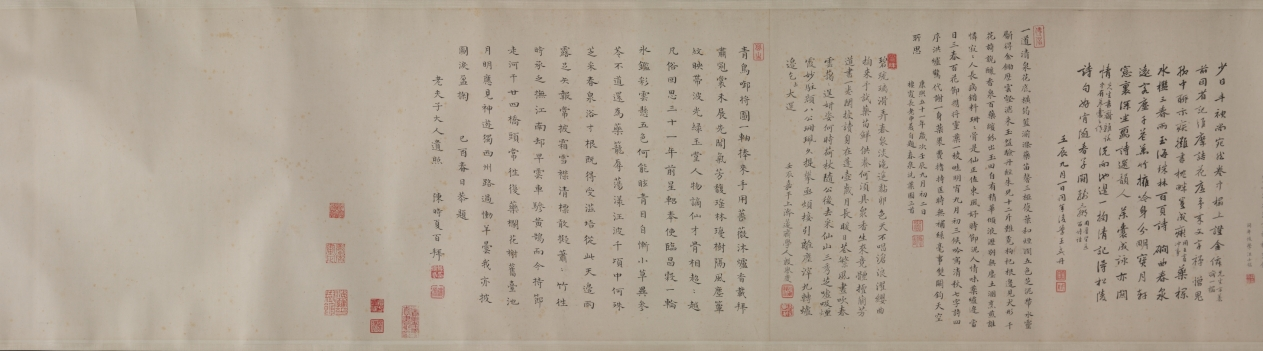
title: Cleansing Medicinal Herbs in the Stream on a Spring Day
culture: China, Qing dynasty (1644-1911)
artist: Yu Zhiding (Chinese, 1647–c. 1716)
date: 1703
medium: Handscroll; ink and color on silk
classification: Painting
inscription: Title by Chen Yixi.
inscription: 姑射仙人冰雪膚，新詩傳唱滿通都。/ 極知遲暮難為別，更展春泉洗藥圖。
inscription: Colophon by Chen Tingjing 陳廷敬 (1639–1712). Colophon by Wang Hongxu 王鴻緒 (1645–1723), dated 1707. Colophon by Song Luo 宋犖 (1634–1714). Colophon by Liu Yan 劉巗. Colophon by Jing Xikui 涇西夔. Colophon by Liu Yan 劉巗. Colophon by Cao Yin 曹寅. Colophon by Wang Shihong 汪士鋐. Colophon by Wang Shidan 王式丹 (1645–1718), dated 1712. Colophon by Shi Shenyi 史申義 (1661–1712), dated 1712. Colophon by Yin Yuqing 殷餘慶, dated 1712.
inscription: Colophon by Chen Shixia 陳時夏, dated 1729.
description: A famous portraitist, Yu Zhiding here depicts the likeness of Shi Shenyi 史申義 (1661–1712), an official and poet. Master Shi, a sickly man, was deeply interested in medicinal science. The opening section of the scroll features a boy washing a fungus in fresh spring water, a basket of medicinal herbs by his side. Other servants carry a fan, a bundle of scrolls, and a cup of tea or hot wine. Master Shi sits in a bamboo grove, surrounded by fields of herbs. Returning swallows, pink peach blossoms, and blooming magnolia indicate spring, whereas the fungus conveys wishes for long life. The spring theme may express the artist’s wish for his friend’s recovery.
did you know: In the pavilion are some of Shi Shenyi’s scholarly accoutrements: a stack of books, an antique zun 尊 (wine vessel), a brush holder, an ink stone, and a small chime.